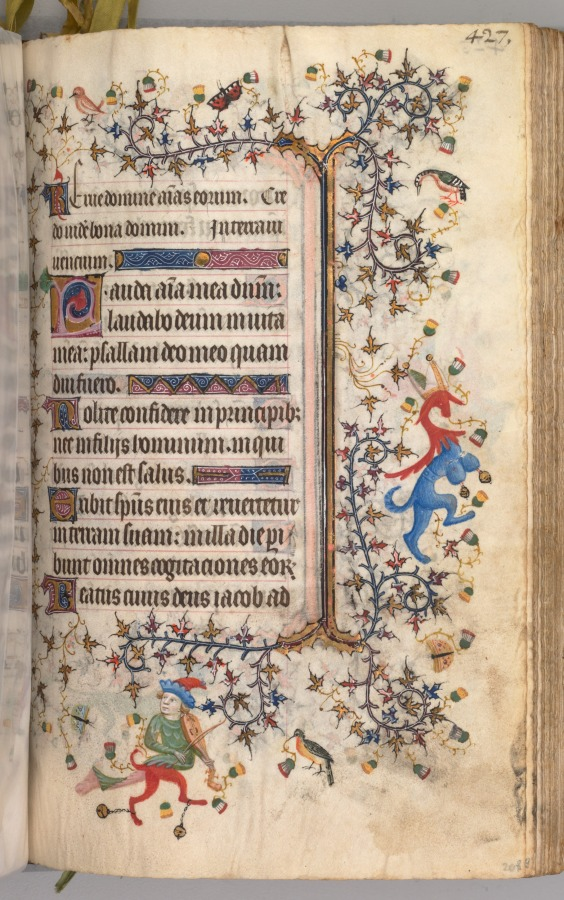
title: Hours of Charles the Noble, King of Navarre (1361-1425): fol. 208r, Text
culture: France, Paris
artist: Master of the Brussels Initials and Associates (French)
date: c. 1405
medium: ink, tempera, and gold on vellum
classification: Bound Volume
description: This precious volume was obviously highly prized by its owner, the French-born King of Navarre, who had his coat of arms painted on no less than twenty folios. Rather than directly commissioning this manuscript from a specific workshop, it seems that Charles the Noble acquired his book of hours -- perhaps ready-made for the luxury market -- while on a trip to Paris in 1404-05. A collaborative effort, six painting styles are evidenced within the pages of this codex, those of two Italians, two Frenchmen, and two Netherlanders. The painter who was responsible for the planning and decoration of the book, and who produced seventeen of the large miniatures, was a Bolognese artist known as the Master of the Brussels Initials. His principal assistant, responsible for most of the borders, was a Florentine who signed his name "Zecho" da Firenze on folio 208 verso.